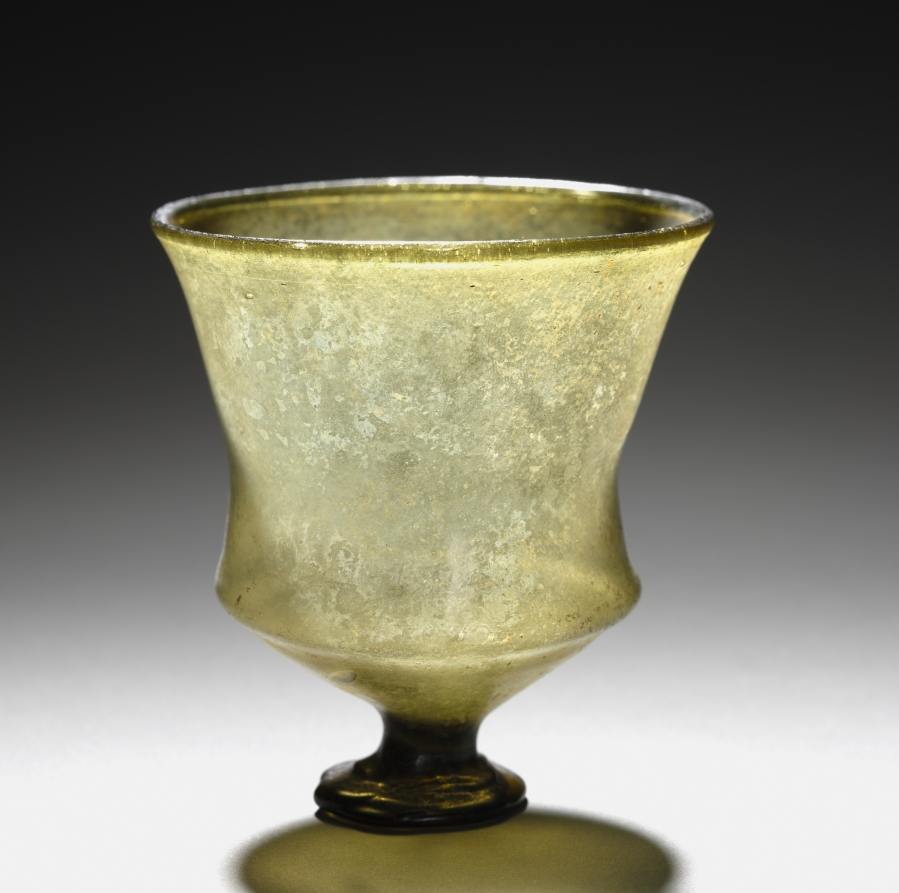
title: Bell Beaker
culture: Syro-Palestinian(?)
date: 500s–600s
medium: glass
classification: Glass